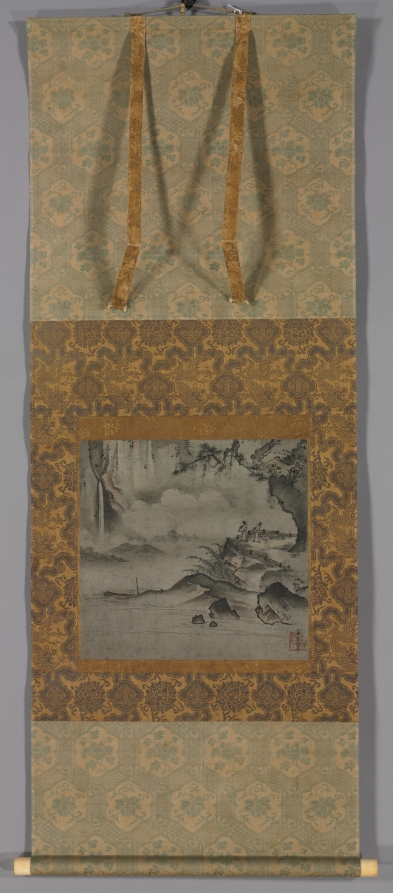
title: Gazing at a Waterfall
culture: Japan, Muromachi period (1392–1573)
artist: Sōami (Japanese, d. 1525)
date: early 1500s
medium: Album leaf mounted as a hanging scroll; ink and slight color on paper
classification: Painting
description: Chinese poet Li Bai’s (701–762) poem “Gazing at a Waterfall on Mount Lu” is about experiencing the vastness of the galaxy in relationship to one’s own being. Japanese Zen monk-poet Keijo Shūrin (1440–1518) identified Li’s poem as the inspiration for Japanese painter Geiami’s (1431–1485) work Gazing at a Waterfall, in the collection of the Nezu Museum, which features sharp brushstrokes and bright colors. In contrast, this album leaf’s painter, Geiami’s son Sōami, took a more delicate approach to the theme. The waterfall and the pair watching it frame the mist rising from the water at the center of the image.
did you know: The setting of this painting is historical China, as evidenced by the clothing and hairstyles of the two people appreciating the waterfall.